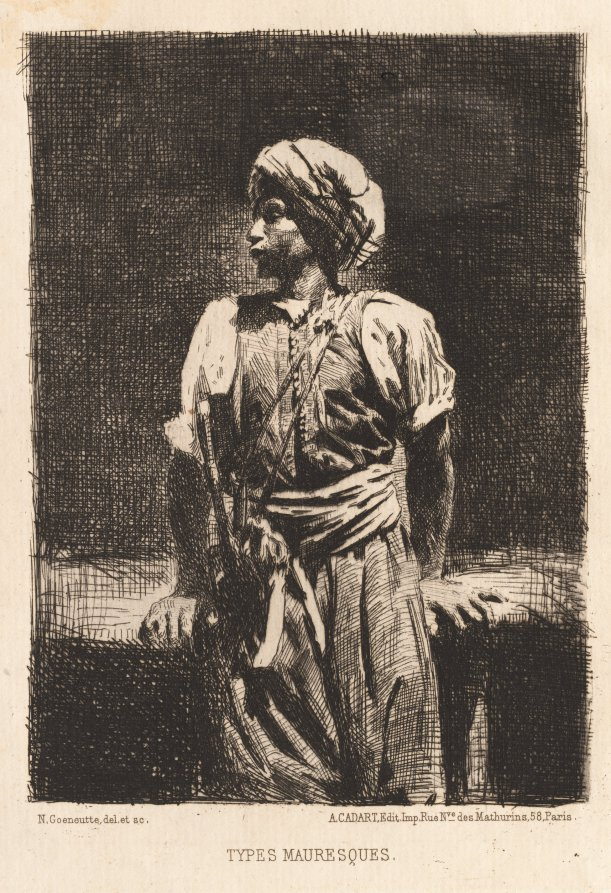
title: Types Mauresques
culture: France, 19th century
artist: Norbert Goeneutte (French, 1854–1894)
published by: A. Cadart Rue des Mathurins, 58 Paris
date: 1875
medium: etching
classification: Print